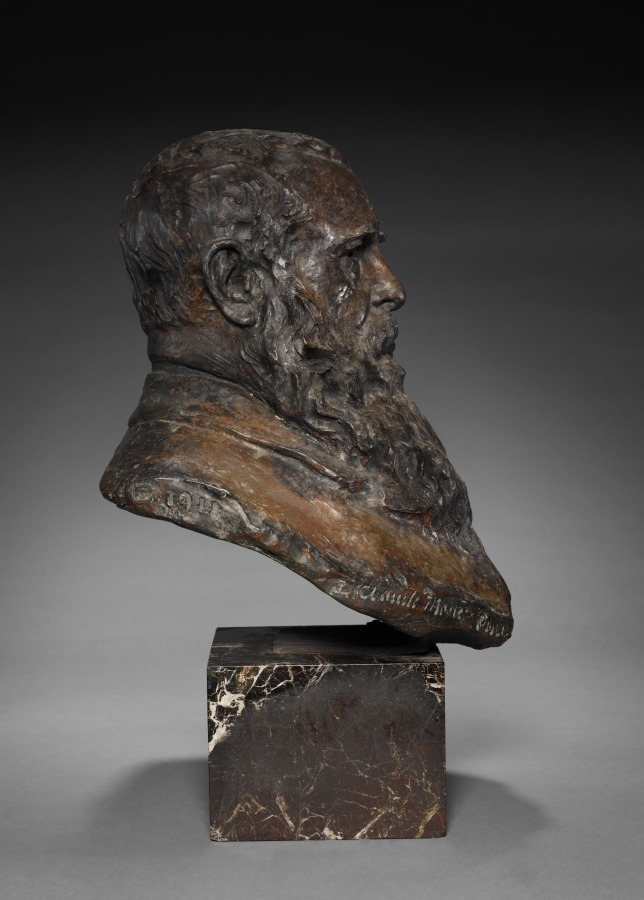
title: Claude Monet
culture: France, 20th century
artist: Paul Paulin (French, 1852–1937)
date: late 1800s-early 1900s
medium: bronze, marble base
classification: Sculpture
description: Paul Paulin was a renowned Parisian dentist who had a passion for sculpting and was encouraged by Edgar Degas to pursue an artistic career. Paulin is best known for his portrait busts of notable Impressionists. There are related versions of this portrait bust of the celebrated painter Claude Monet at three museums in Paris: the Petit Palais (plaster), the Musée d'Orsay (bronze), and the Musée Rodin (bronze).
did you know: In addition to Claude Monet, Paul Paulin also made portrait busts of Edgar Degas, August Renoir, Camille Pissarro, and Auguste Rodin.